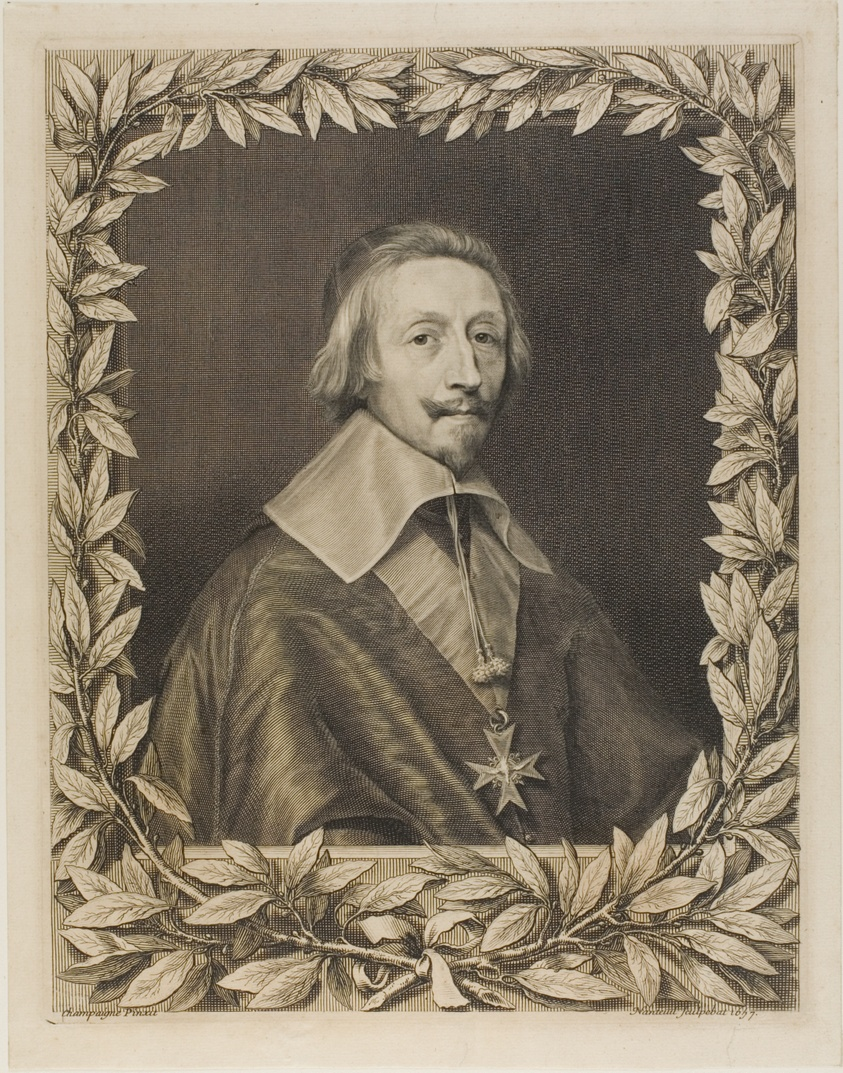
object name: Print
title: Cardinal Richelieu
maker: Robert Nanteuil (French, 1623-1678); after Philippe de Champaigne (French, 1602-1674)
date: 1657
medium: Engraving on paper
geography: France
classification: engraving; print; prints and drawing